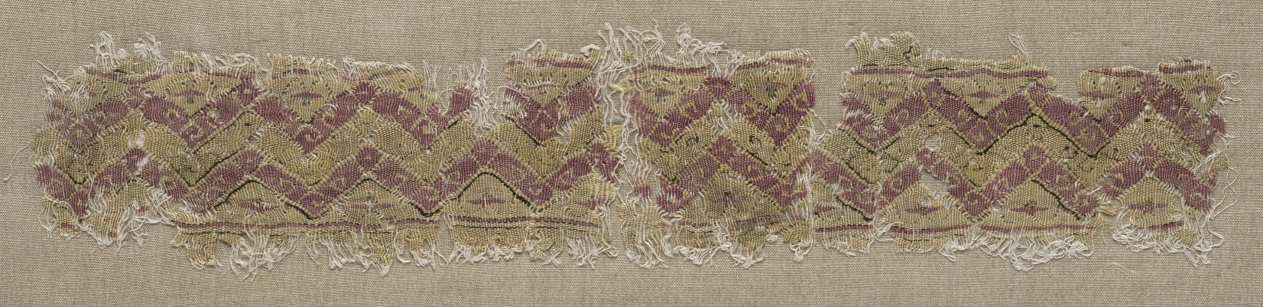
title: Fragment of a Tiraz-Style Textile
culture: Egypt, Fatimid period, Caliphate of al-Mustansir, 1000s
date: 1081–1101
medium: tapestry (originally inwoven in a tabby ground); linen and silk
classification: Textile